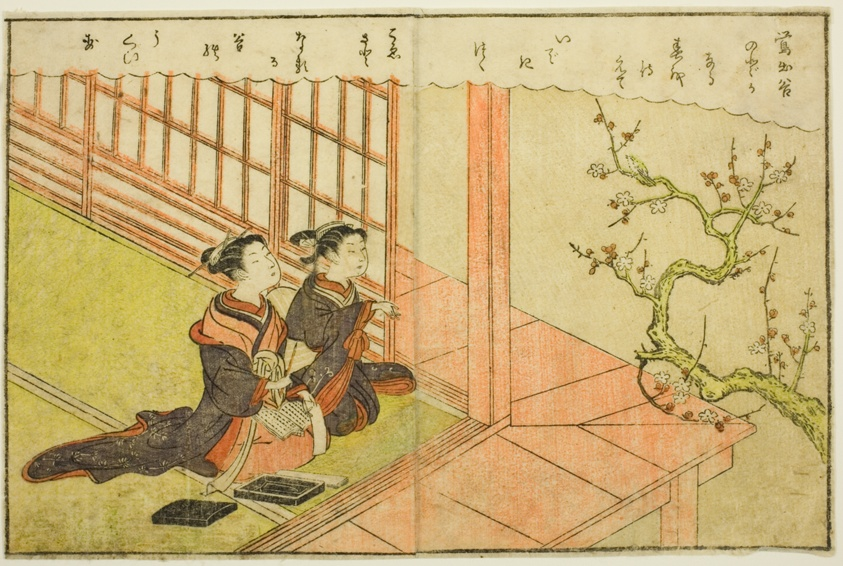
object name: Print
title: Double-page Illustration from Vol. 1 of "Picture Book of Spring Brocades (Ehon haru no nishiki)"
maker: Suzuki Harunobu 鈴木 春信; Japanese, 1725 (?)-1770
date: 1771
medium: Color woodblock print; double-page illustration from book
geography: Japan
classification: woodblock print; print; asian art